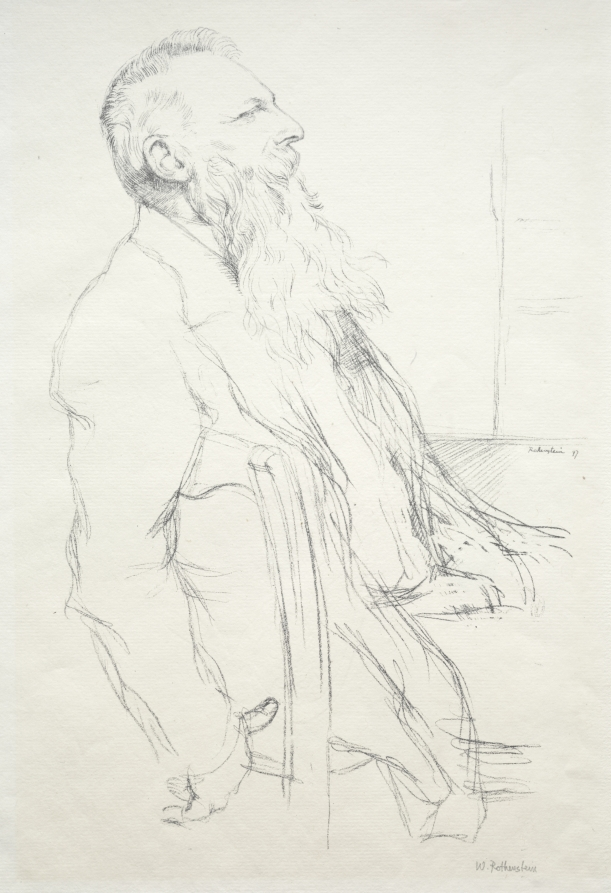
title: Auguste Rodin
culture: England, late 19th Century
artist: William Rothenstein (British, 1872–1945)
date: 1897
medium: lithograph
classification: Print